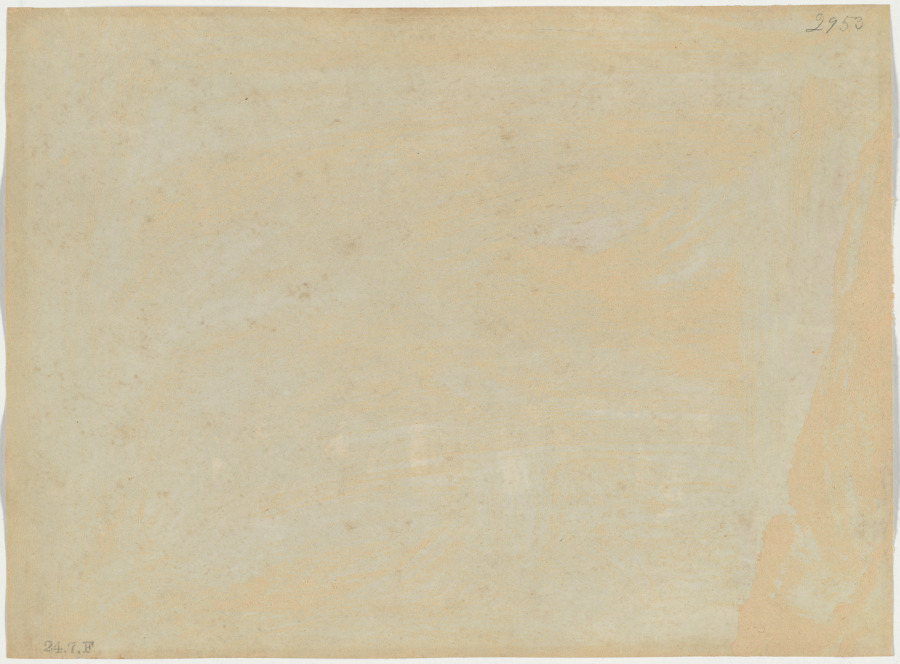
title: Badminton Party at Mashobra, Shimla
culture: India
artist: Raja Deen Dayal (Indian, 1844–1905)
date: 1887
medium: albumen print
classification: Photograph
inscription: Written in pencil on verso: “2953” Stamped in black ink on verso: “24.7.F”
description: This scene is from one of many lavish entertainments hosted by caterer, restaurateur, and hotelier Federico Peliti (Italian, 1844–1914) at his forested country estate outside Simla. In the photograph, Peliti is on horseback and his wife Judith on the swing.. Swings have a long history as items of leisurely pleasure in Europe and India. Badminton, which originated in England in 1873, was popular in India. Deen Dayal may have been invited to document this gathering because he and Peliti, an amateur photographer, both belonged to the Photographic Society of Bombay.